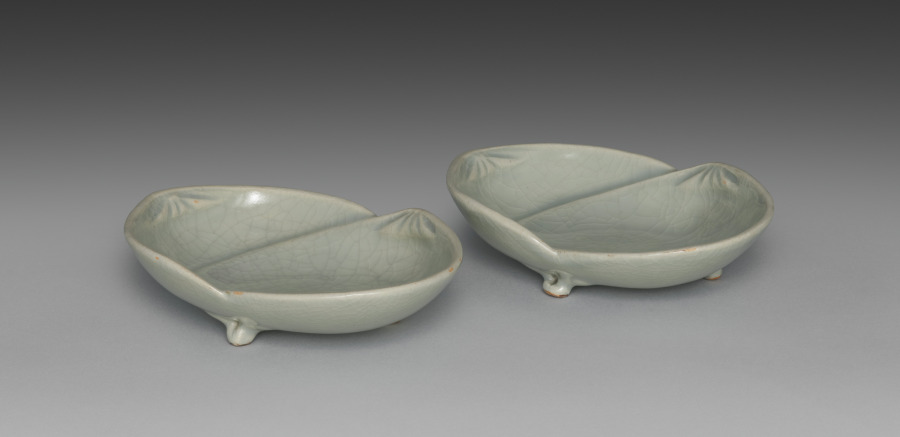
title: Saucers with Matching Shells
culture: Japan, Meiji period (1868–1912)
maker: Seifū Yohei III (Japanese, 1851–1914)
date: 1893–1914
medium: Pair of dishes; porcelain with green glaze and crackling, molded design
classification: Ceramic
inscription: 清風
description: Yohei III’s main output for his sophisticated clientele was in the form of tea sets and dining sets. He created a range of dishes in green glazes. He often produced in pairs, sets of five, or sets of ten. This pair of shell dishes have a box lid interior attestation by Yohei IV that the dishes were made by Yohei III with a cracked-ice (hyōretsu) pattern in the glaze, omitting reference to any glaze coloration.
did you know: These shell-shaped dishes are of the saucer type, suitable for dipping sauces.